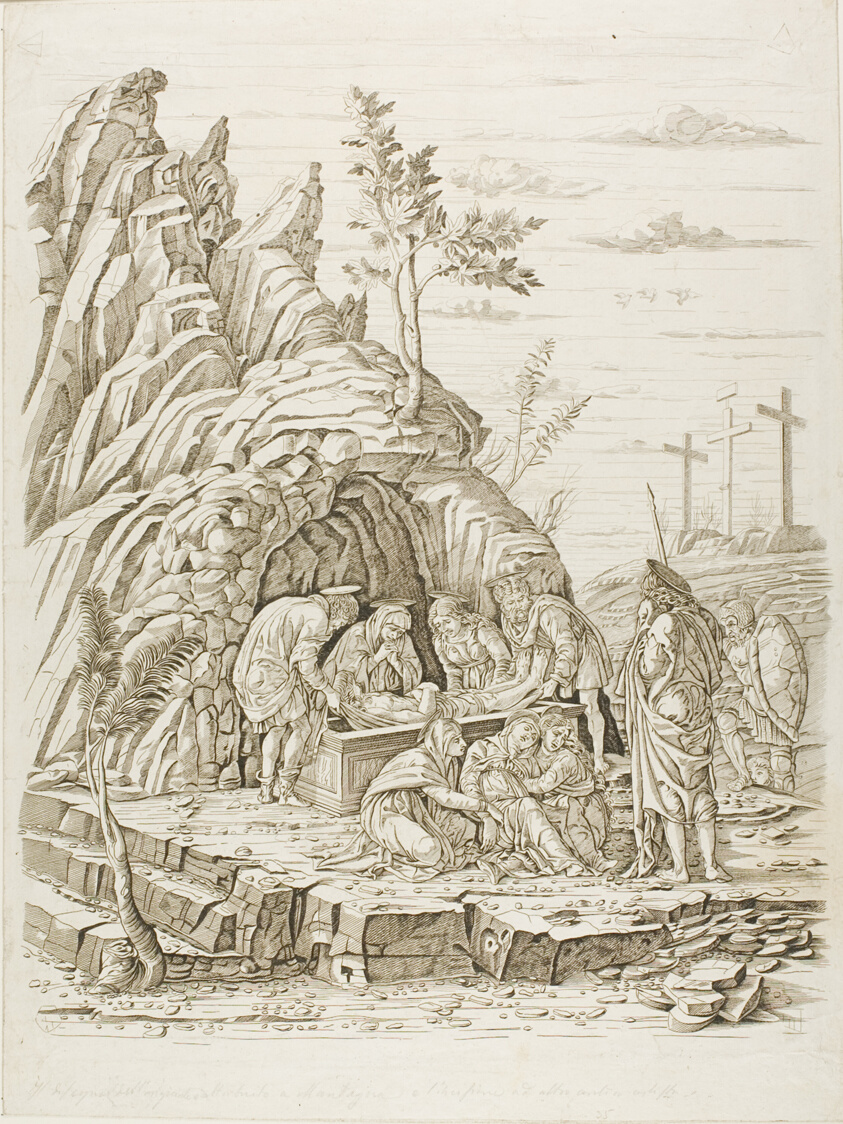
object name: Print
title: The Entombment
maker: Workshop of Andrea Mantegna; Italian, 1431-1506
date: 1485/90, possibly printed in the 18th century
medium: Engraving on paper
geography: Italy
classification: engraving; print; prints and drawing